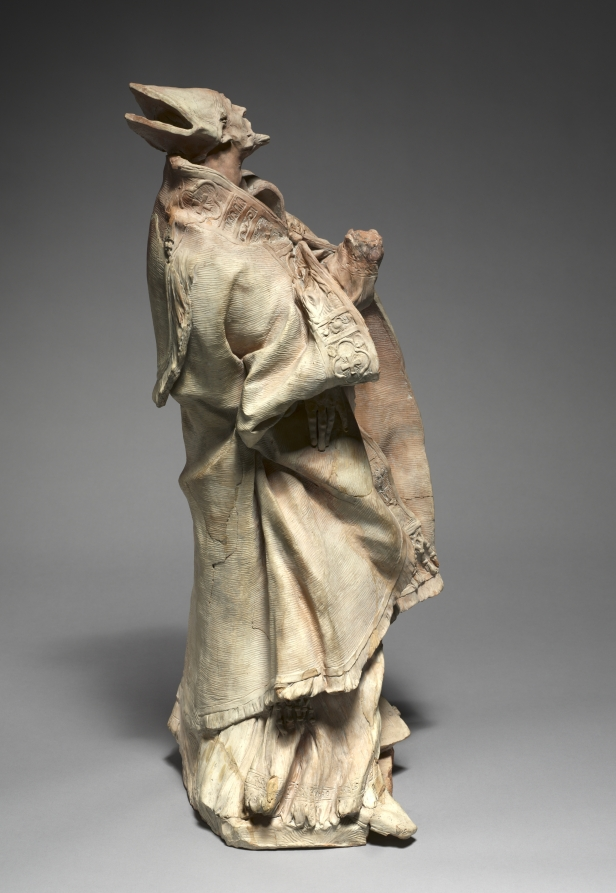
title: Study for The Blessed Alessandro Sauli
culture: France, made in Genoa, 17th century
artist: Pierre Puget (French, 1620–1694)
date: 1663–1668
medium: terracotta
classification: Sculpture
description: A famous preacher from an aristocratic family in Genoa, Sauli (1534-1591) spearheaded important Catholic reforms, including popular missions and restructuring the church to reach a broader spectrum of worshippers. This sculpture is a model for a large statue commissioned by the Sauli family for a Genoese church. Although the open book speaks to Sauli’s work as a reformer, his twisting body and facial expression indicate utter absorption in a deeply personal vision.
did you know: Terracotta models, like this study for a sculpture, are also known as bozzetti or modelli.